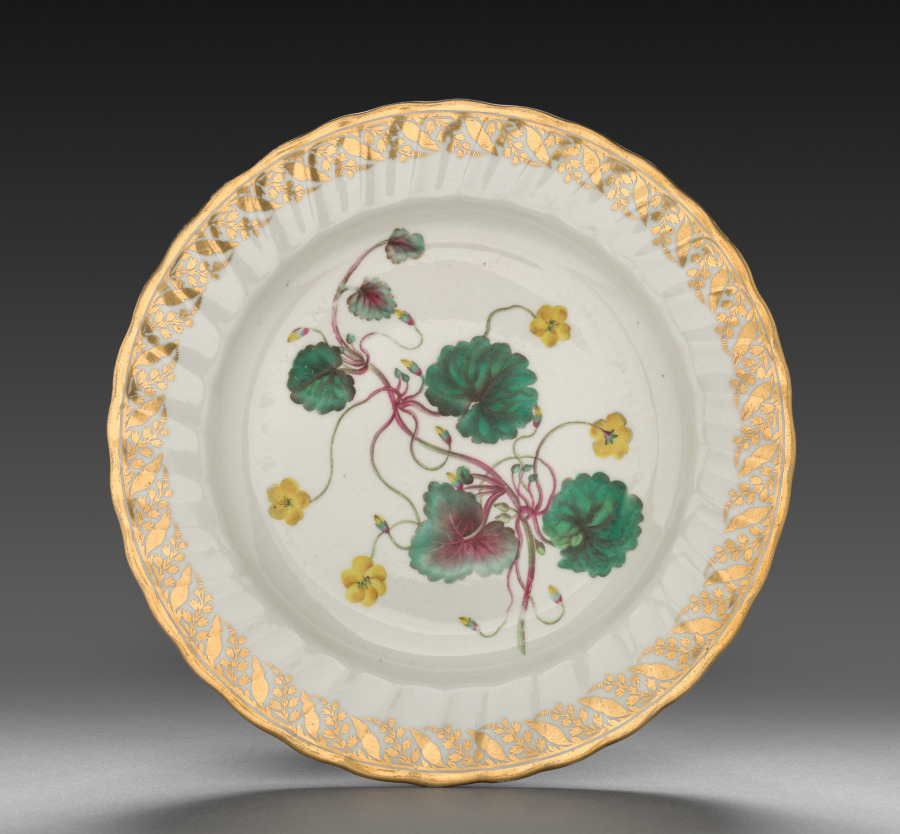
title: Plate from Dessert Service: Trailing Disandra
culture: England, Derby, 18th century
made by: Derby (Crown Derby Period) (British)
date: c. 1800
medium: porcelain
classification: Ceramic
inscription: inscribed in blue on back: Disandra Prostrata./Trailing Disandra./crown/crossed batons and dots/D/115.